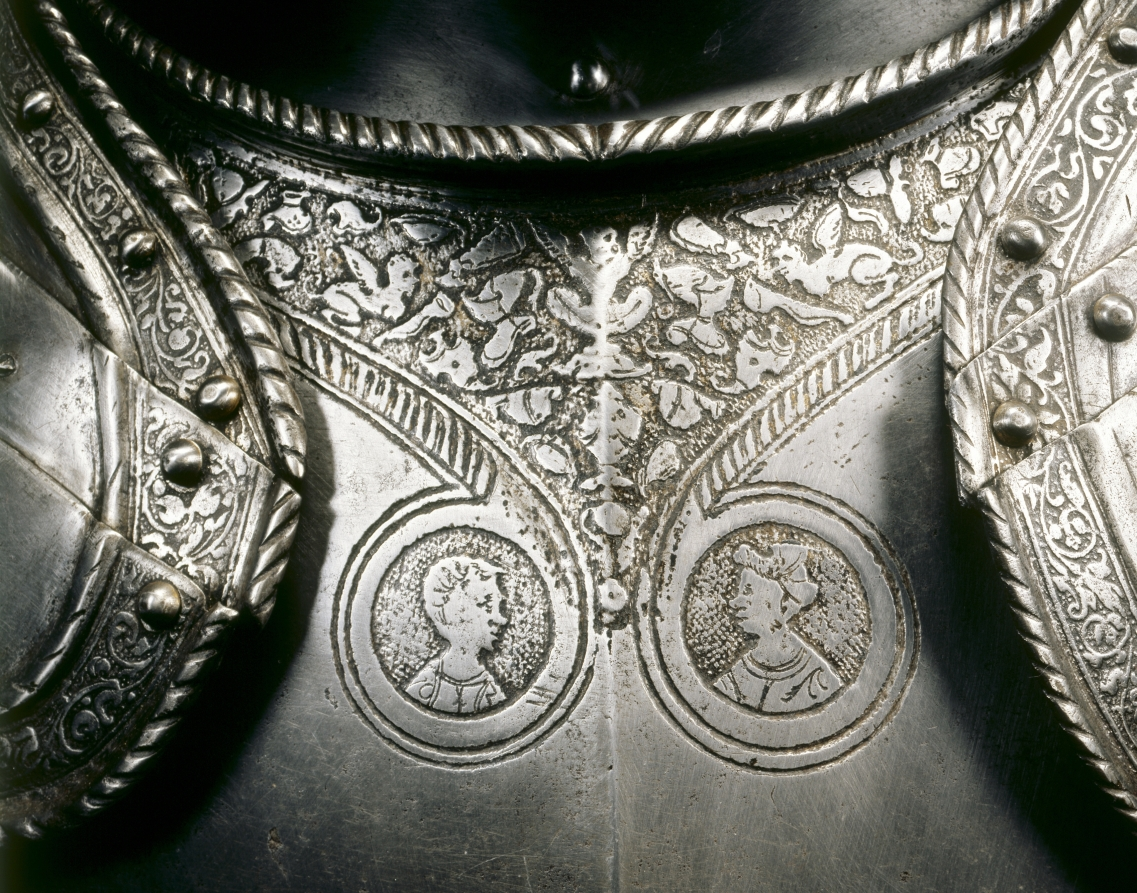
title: Half-Suit of Armor for the Field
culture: North Italy, Brescia (?), 16th century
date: c. 1575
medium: steel with etched decorative bands and roundels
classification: Arms and Armor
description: Decoration was critical to fine armor, and etching was the most commonly used technique. Here, the bands along the borders are etched. On the breastplate, pauldrons (shoulder guards), and tassets (hip and upper leg guards), etched medallions enclose profile busts reminiscent of ancient Roman portraits. The lance rest on the breastplate indicates that this half-suit was once part of a complete field armor for man and horse. The etching technique used for armor was developed in the late 1400s. The metal surface was first coated with an acid-resistant substance, such as wax or varnish. An etching needle was then used to scratch a design into the surface. The exposed areas were then treated with an acid that would "bite" or etch the lines into the metal. When the coating was removed, the etched design was blackened for contrast.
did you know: This is an example of raised field etching where the design stands out in slight relief from the background.